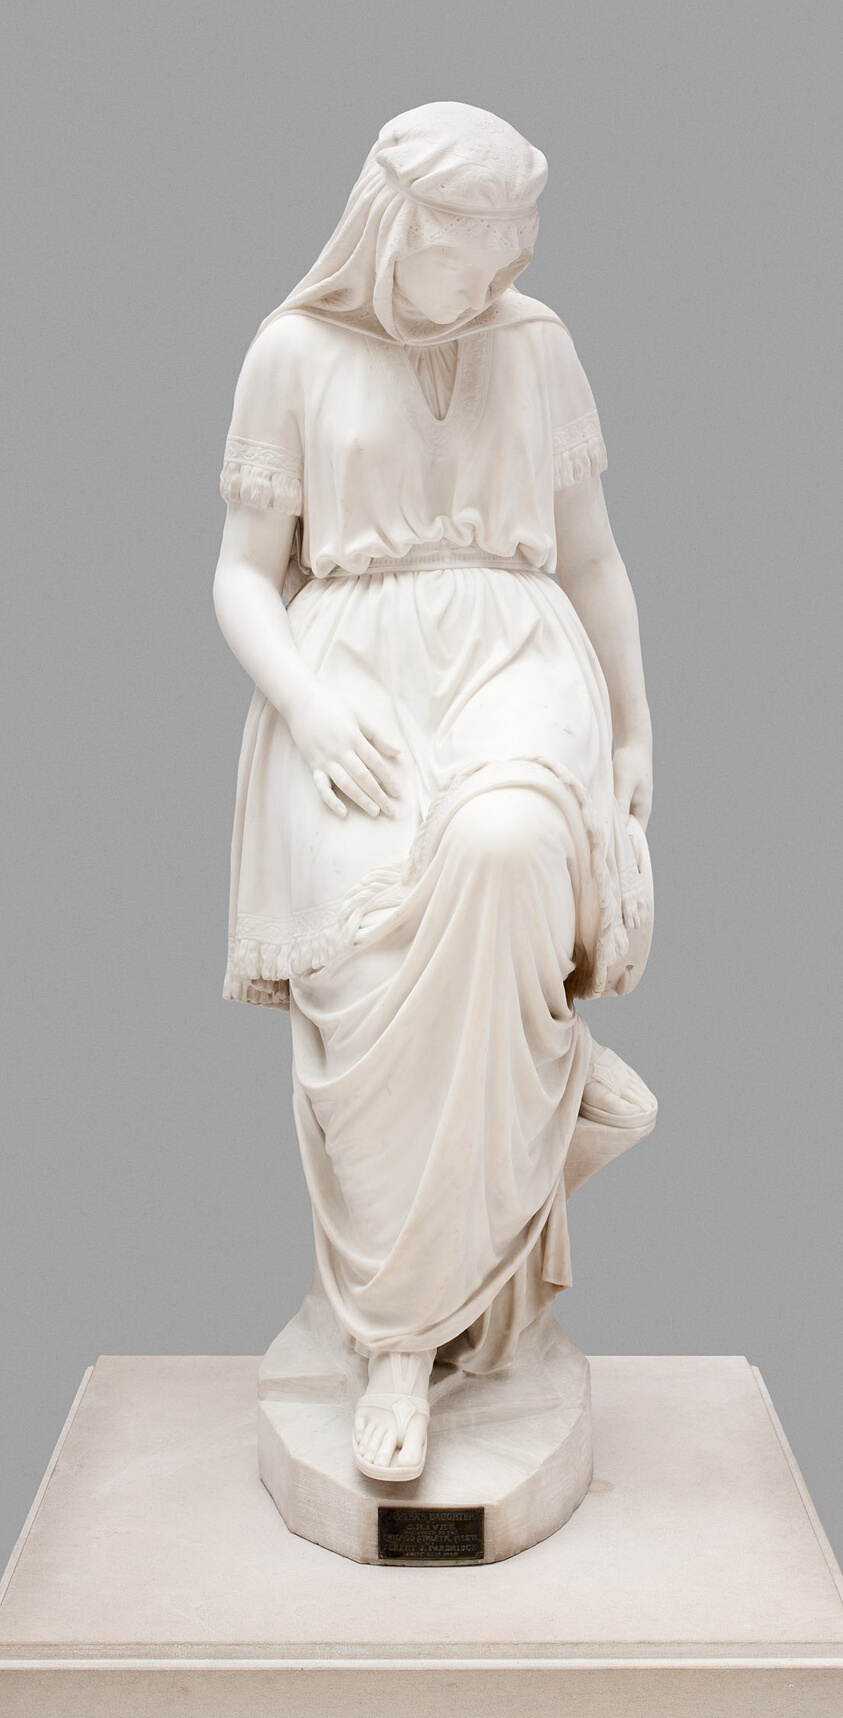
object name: Sculpture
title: Jephtha's Daughter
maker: Chauncey Bradley Ives (American, 1810–1894)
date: 1874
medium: Marble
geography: United States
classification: sculpture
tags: people, portraits